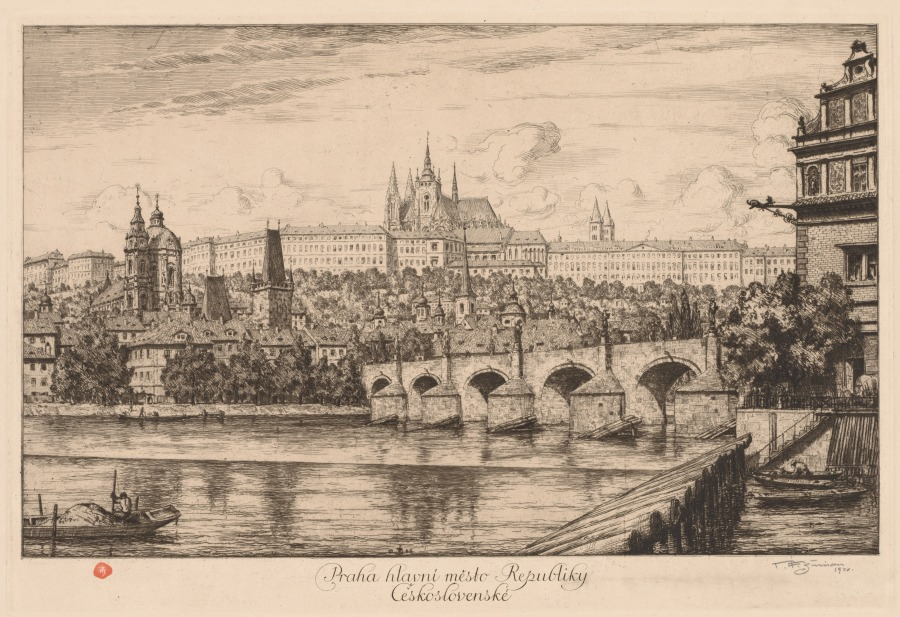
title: Old Prague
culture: Czechoslovakia, 20th century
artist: T. Frantisek Simon (Czech, 1877–1942)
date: 1920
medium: etching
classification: Print